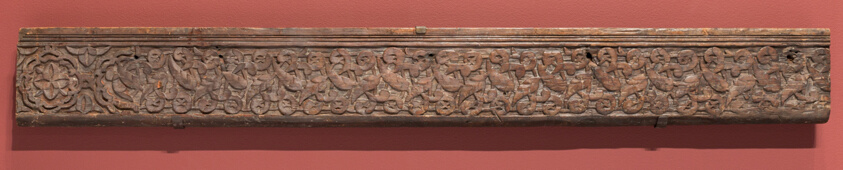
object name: Architectural fragment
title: Carved Wooden Panel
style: Islamic (culture or style)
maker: Morocco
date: Marinid dynasty (1244–1465), 14th century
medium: Carved wood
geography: Morocco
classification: wood; architectural fragment; asian art